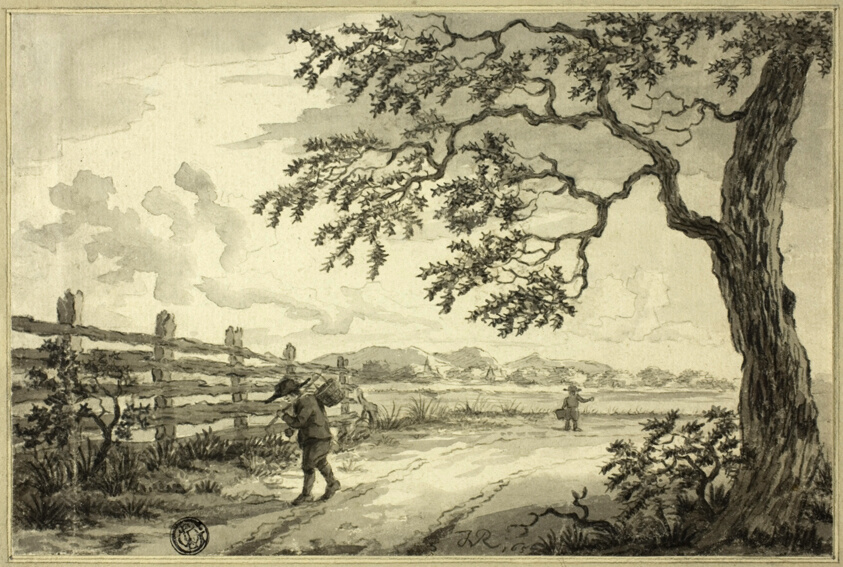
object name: Drawing and Watercolor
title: Figures with Baskets on Road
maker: Style of Jacob van Ruisdael (Dutch, 1628/29-1682)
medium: Black chalk, with brush and gray wash, on ivory laid paper, tipped onto cream laid card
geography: Holland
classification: pen and ink drawings; drawings (visual works); prints and drawing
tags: landscapes